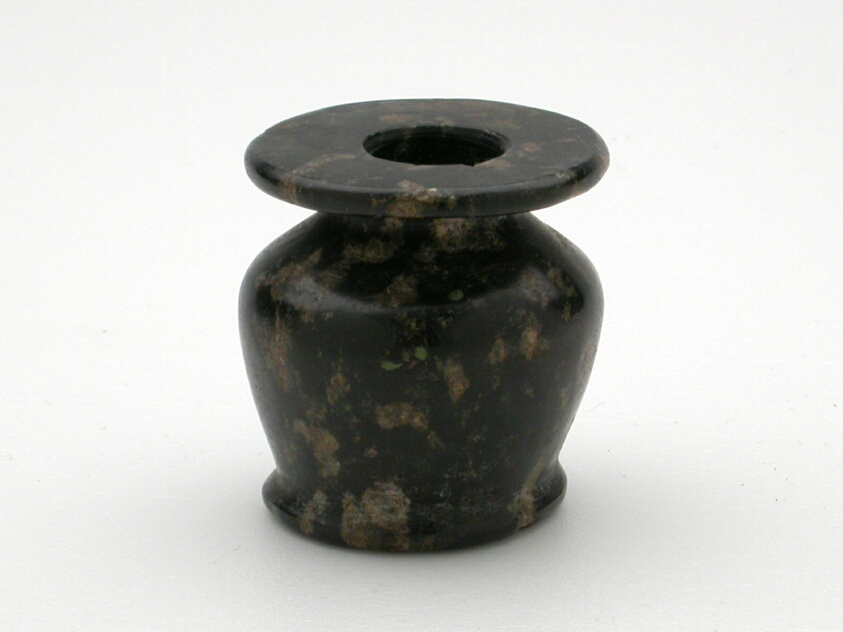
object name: Vessel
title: Kohl Jar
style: eighteenth dynasty, new kingdom, egyptian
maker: Egyptian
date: New Kingdom, Dynasty 18 (about 1550–1069 BCE)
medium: Stone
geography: Egypt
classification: personal grooming / hygiene / cosmetic container; stone; container; vessel; ancient art